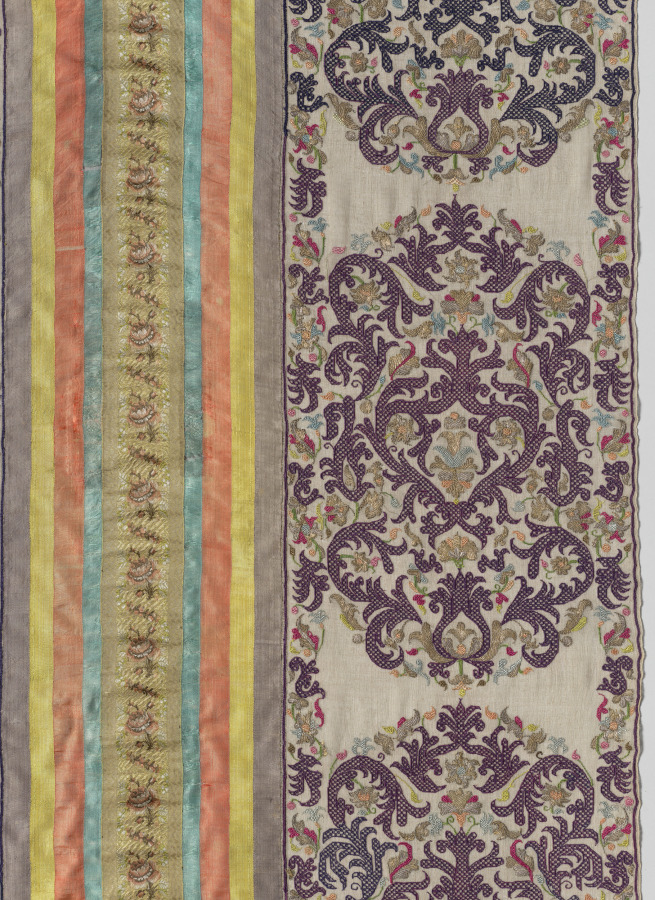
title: Curtain panel (sitara)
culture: Africa, North Africa, Algeria, Algerian weaver and embroiderer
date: 1800s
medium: Linen, silk, gold, silver, dye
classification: Embroidery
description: During the 1700s, stunning large embroidered door curtains such as these hung across doorways onto interior courtyards of multistoried residences. Light entered through their loosely woven linen ground while the reversible embroidered decoration provided beauty and privacy. Such curtains have three embroidered widths, the third missing here, joined by colorful plain silk ribbons flanking a French floral ribbon in the center.